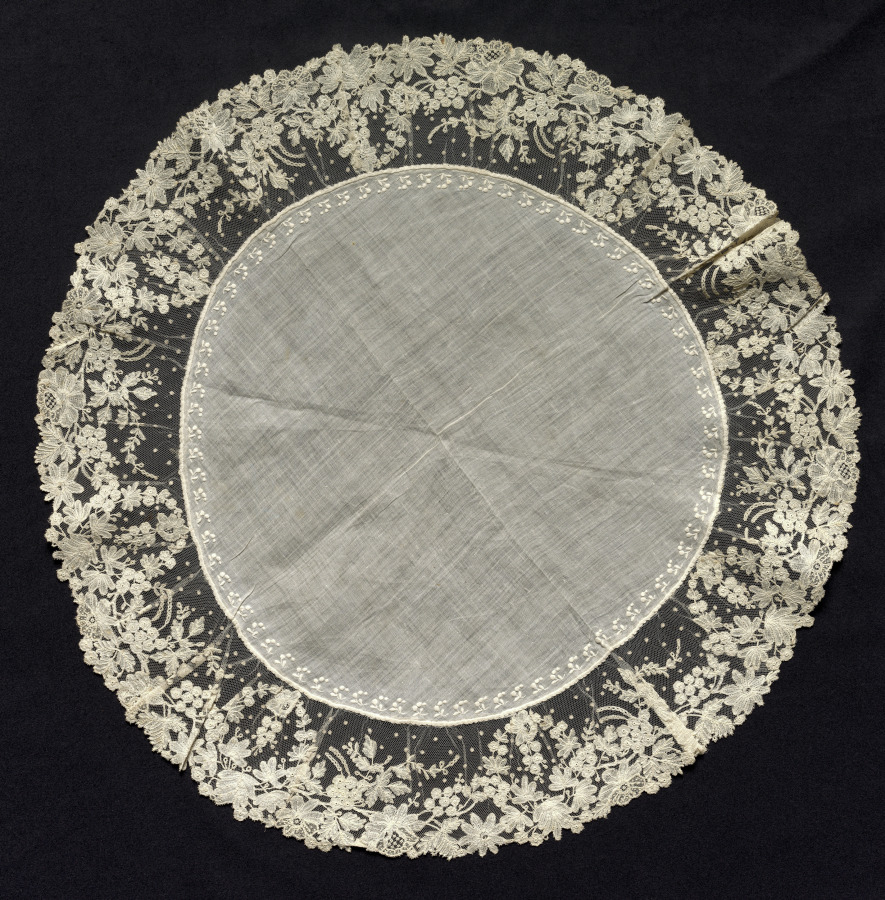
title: Lace Handkerchief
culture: Flanders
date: 1800–1840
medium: Plain weave linen center with embroidery; edging of Flemish bobbin lace applied to machine-made net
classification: Lace